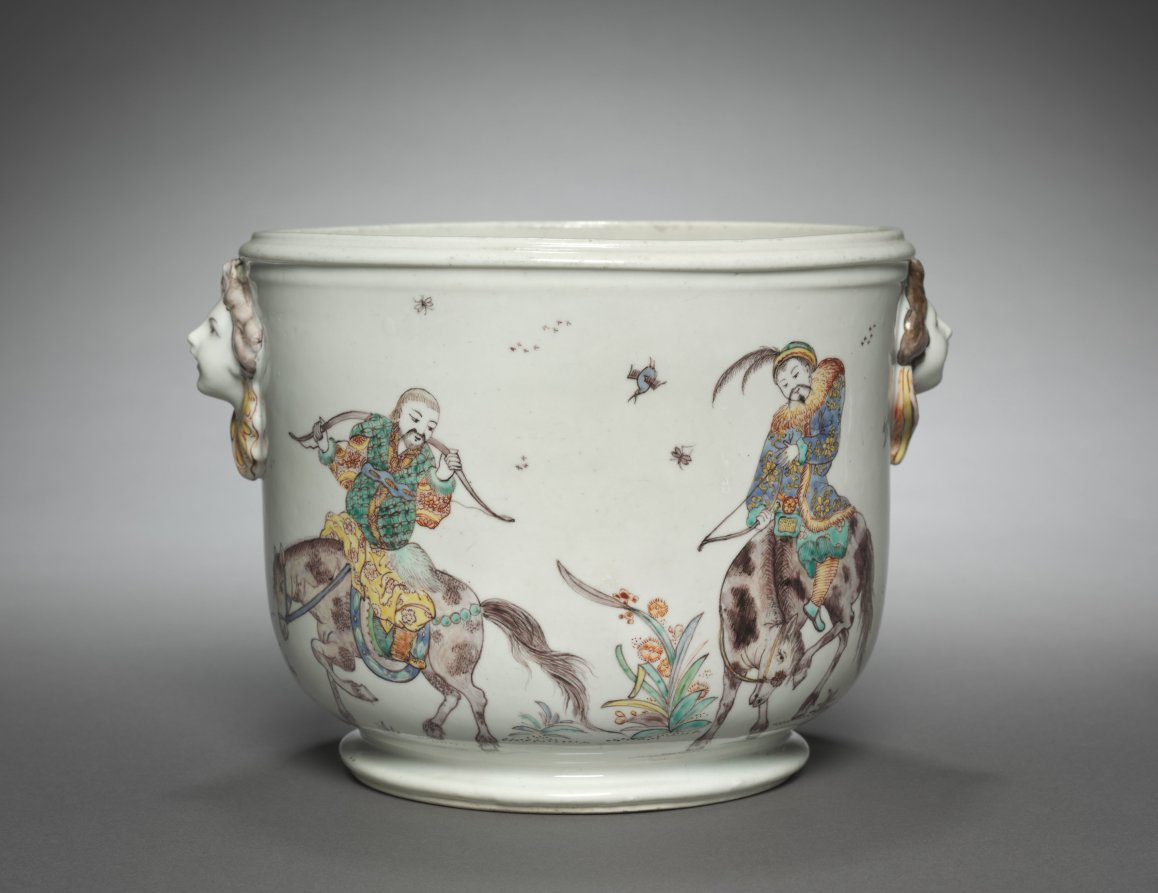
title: Bottle Cooler (seau à bouteille)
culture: France, Mennecy, 18th century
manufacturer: Mennecy- Villeroy Factory (French)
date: c. 1755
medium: Tin-glazed soft-paste porcelain with enamel decoration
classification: Ceramic